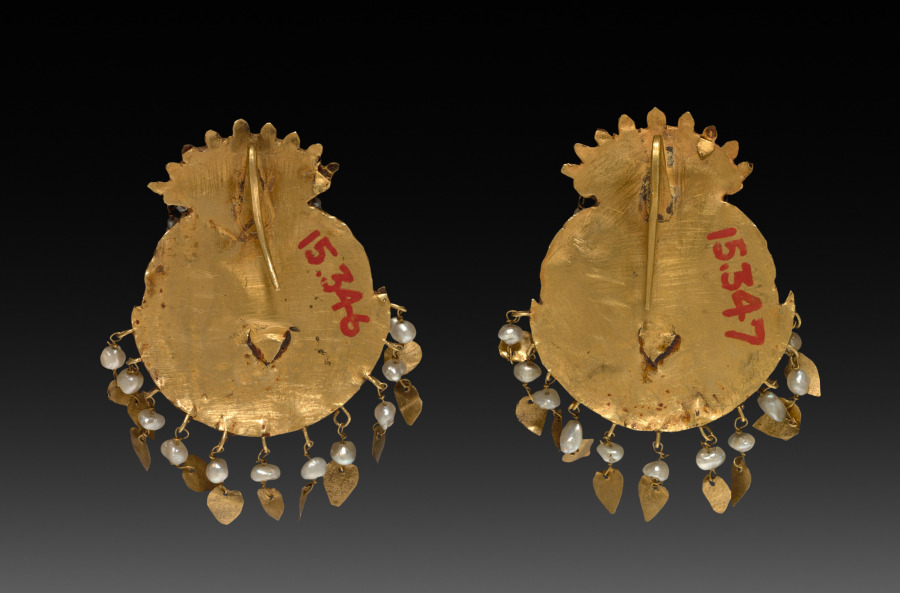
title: Pair of Earrings with Four-Armed Vishnu Riding Garuda with Nagas (serpent divinities)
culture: Nepal, Kathmandu Valley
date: 1600s or 1700s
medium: repousse gold with pearls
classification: Jewelry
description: In Nepal, sculptures of deities were adorned with jewelry larger than pieces made for human beings. This pair of earrings features the Hindu god Vishnu seated cross-legged riding his mount the man-eagle Garuda. Garuda's arms are outstretched, grabbing the tails of serpents whose braided bodies snake up both sides of each earring. His wings drape like a cape behind him, and his talons clutch his crescent moon perch. Serpent hoods rise up behind Vishnu like a canopy.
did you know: Vishnu and Garuda are solar deities, and they sit on the crescent moon, so the light of both celestial bodies shines from these earrings.